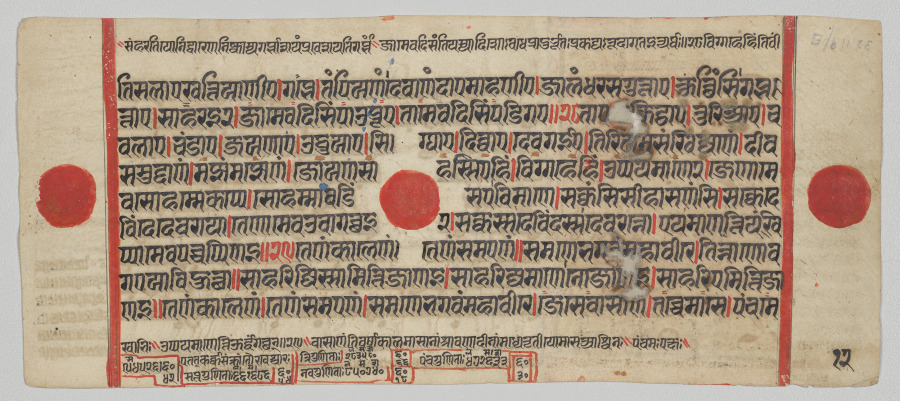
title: Text, folio 12 (verso), from a Kalpa-sutra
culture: Western India, Gujarat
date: c. 1475–1500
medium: Gum tempera, ink, and gold on paper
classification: Painting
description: The tiny captions written in Sanskrit to the right of the painting identify the subject of this scene: “abduction of the embryo” and “transfer of the embryo.” The embryo is the unborn founder of the Jain religion. In this miraculous episode, a goat-headed divinity who presides over miscarriage and childbirth gently takes the embryo in his cupped hands away from the reclining Brahmin lady in the scene above. Below, he carries it to a queen, who will be his birth mother.